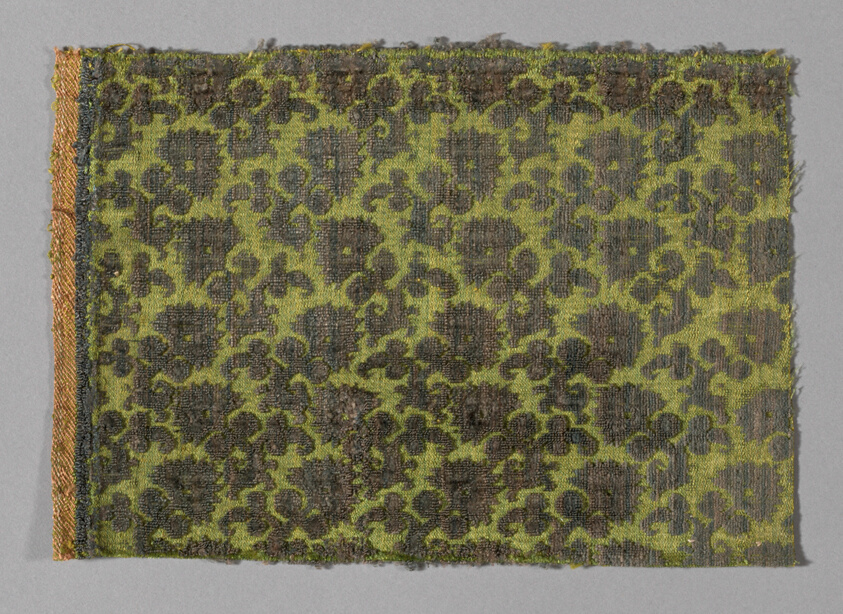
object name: Textile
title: Fragment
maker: Italy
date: 17th century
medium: cisele voided twill velvet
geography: Italy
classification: textile; weaving - velvet; weaving